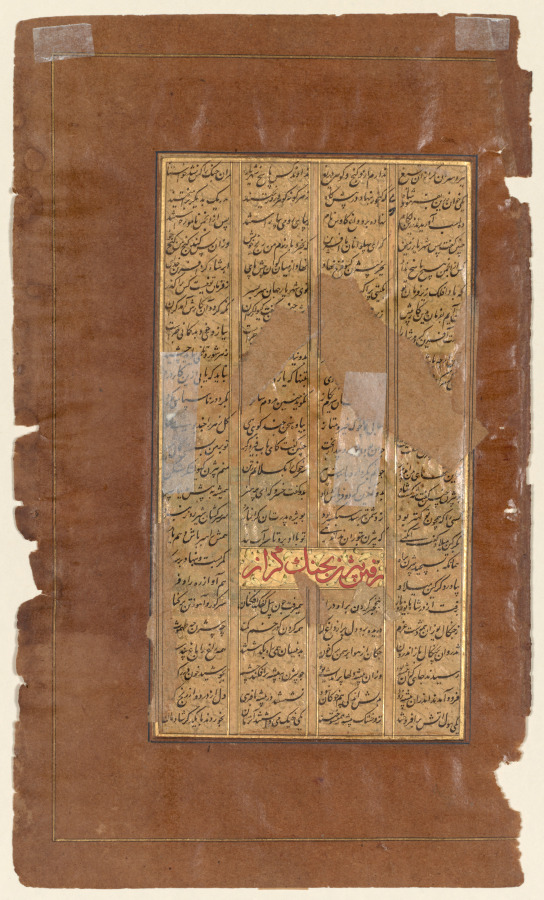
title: Bijan killing the wild boars of Irman, from a Shah-nama (Book of Kings) of Firdausi (Persian, about 934–1020), (recto)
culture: India, Bijapur, Deccan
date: c. 1610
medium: Gum tempera, ink, and gold on paper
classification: Painting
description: This illustrated page from a Shah-nama depicts the first adventure of the hero Bijan, son of an Iranian knight. When reports arrived at the king’s court of wild boars ravaging the borderlands between the enemy realms of Iran and Turan, Bijan volunteered to hunt and kill the beasts, much to the chagrin of his father, who doubted his young son’s ability to navigate the politically volatile situation. The fearless Bijan is shown on horseback as he singlehandedly strikes down on the bodies of the wild boars in the brush. After overzealously celebrating his success, Bijan must be rescued from a pit by Rustam. This early manuscript from the Deccan made for the sultan of Bijapur is characterized by glowing colors and lavish use of gold.